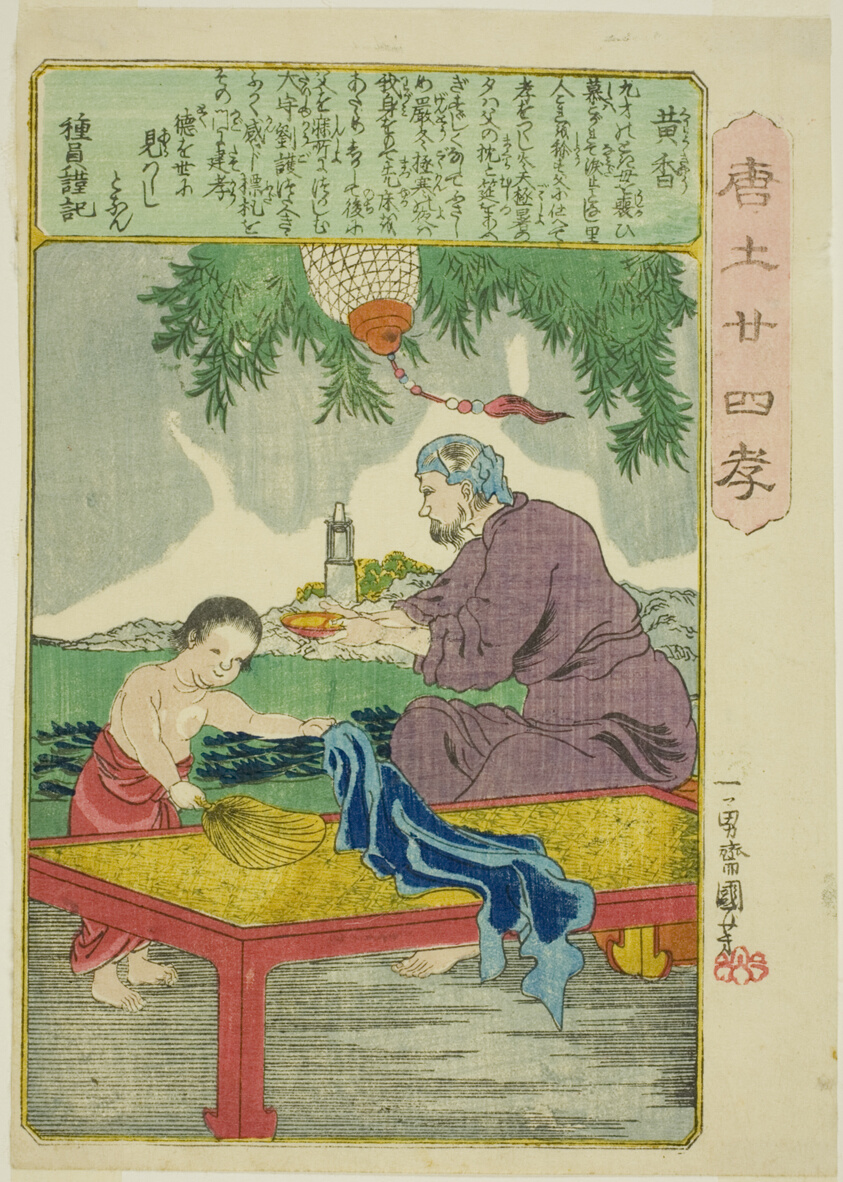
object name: Print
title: Huang Xiang (Ko Kyo), from the series "Twenty-four Paragons of Filial Piety in China (Morokoshi nijushiko)"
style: Japanese (culture or style)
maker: Utagawa Kuniyoshi (Japanese, 1797-1861)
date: c. 1848/50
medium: Color woodblock print; chuban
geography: Japan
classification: woodblock print; print; asian art